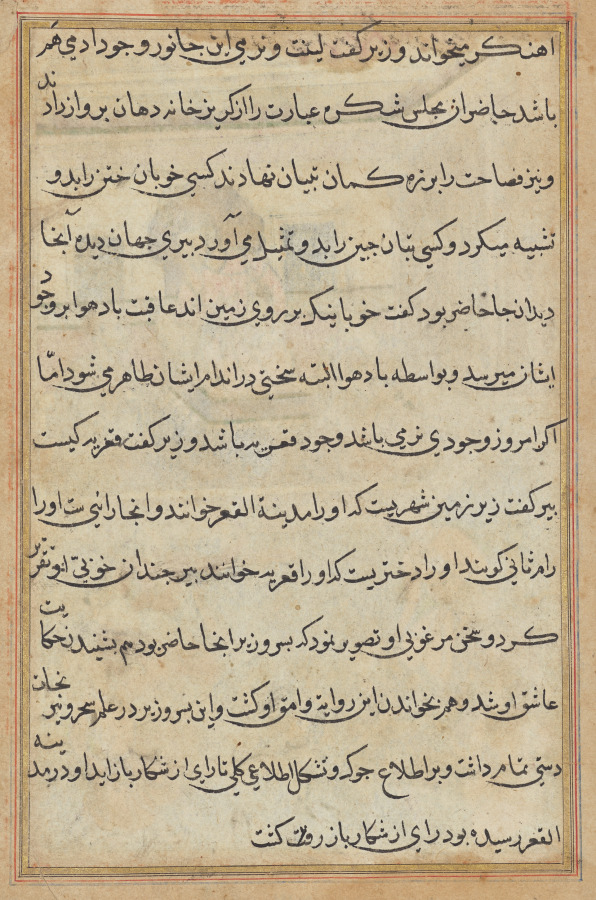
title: Page from Tales of a Parrot (Tuti-nama): text page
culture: Mughal India, court of Akbar (reigned 1556–1605)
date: c. 1560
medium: gum tempera, ink, and gold on paper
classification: Painting